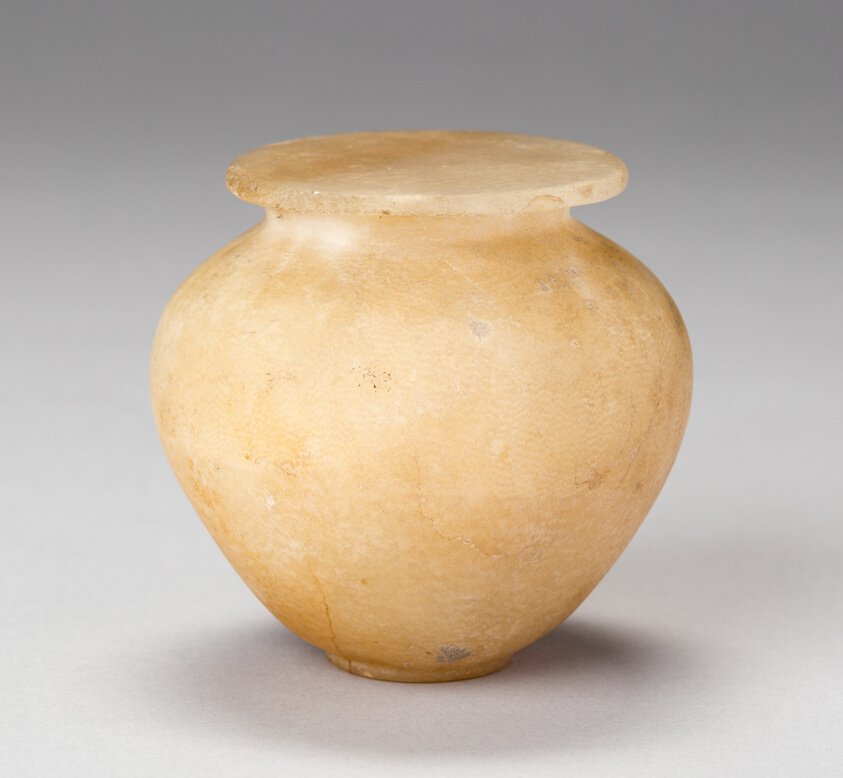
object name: Vessel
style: first dynasty, early dynastic (egyptian)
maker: Egyptian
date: Old Kingdom, Dynasty 4–6 (about 2613–2181 BCE)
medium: Travertine (Egyptian alabaster)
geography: Egypt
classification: vessel; stone; ancient art